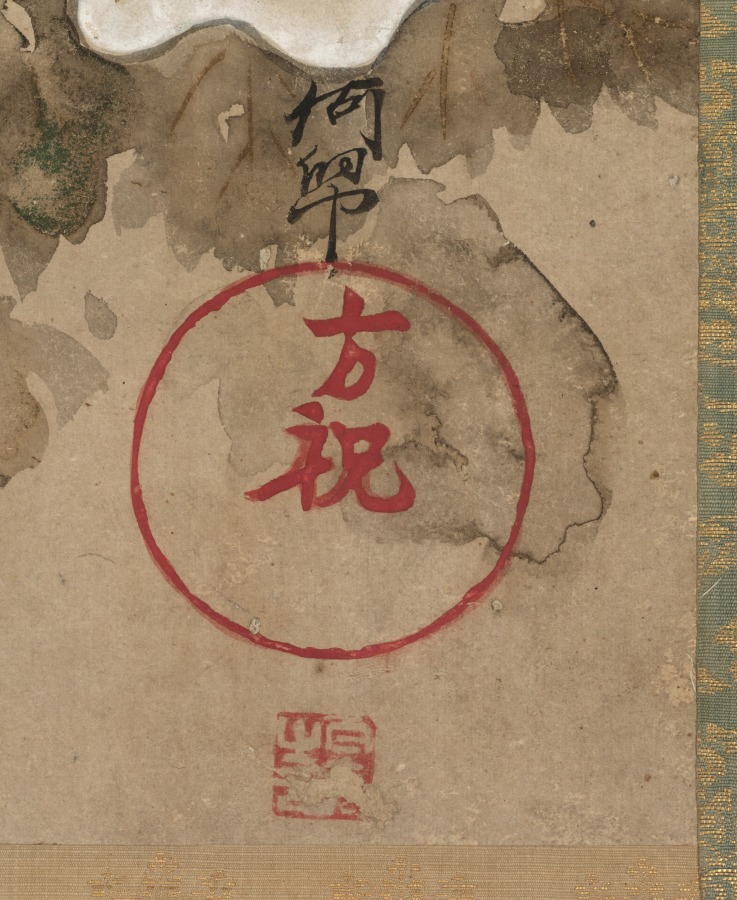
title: Peonies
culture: Japan, Edo period (1615–1868)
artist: Tatebayashi Kagei (Japanese, active mid-1700s)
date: mid 1700s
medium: hanging scroll; ink and color on paper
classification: Painting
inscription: lower right, Kagei's signature in black, a round red seal and a small square one.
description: A proliferation of white tree peonies dominates this composition. Behind them are tall, feathery-topped susuki grasses and leafy deciduous trees. Tatebayashi Kagei restricted his palette to ink with red and white color, along with sparing use of green in the peony leaves and the blades of grass. He made generous use of the “dripping-in” (tarashikomi) technique, layering pooled ink and color, in the peony leaves. The areas left in reserve create the impression of insect-eaten or late season foliage.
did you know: In 1738, Kagei received a copy made by Ogata Kōrin of a fan painting by Tawaraya Sōtatsu from Kōrin's brother Ogata Kenzan, so some think he trained with Kenzan in Edo (present-day Tokyo).